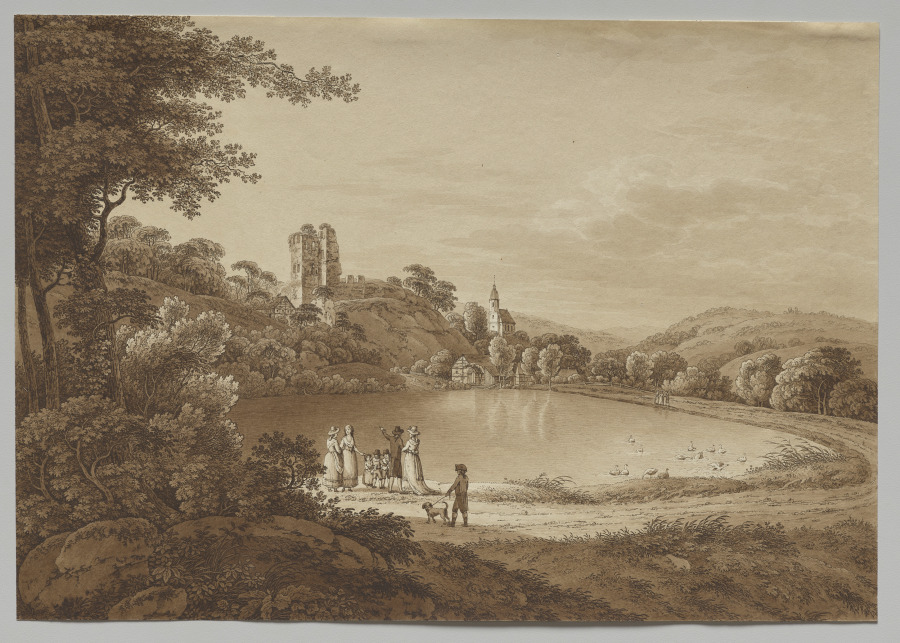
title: Landscape with Tharandt Castle Ruins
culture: Switzerland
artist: Adrian Zingg (Swiss, 1734–1816)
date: c. 1800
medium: Hand-colored and sepia toned etching on wove paper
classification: Print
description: Swiss artist Adrian Zingg made the landscape of Saxony his primary and almost exclusive subject and sought out dramatic views, often featuring the country’s distinctive waterfalls, landscapes, and ruins, to convey its grandeur while maintaining a topographical precision. These two prints depict the ruins of Tharandt castle, a medieval structure outside Dresden. Zingg traveled to the site to sketch with friends, captivated by the juxtaposition between nature’s grandeur and the castle’s impermanence.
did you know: Soon after Adrian Zingg sketched this view in the village of Tharandt, the area became popular among tourists for its dramatic views.